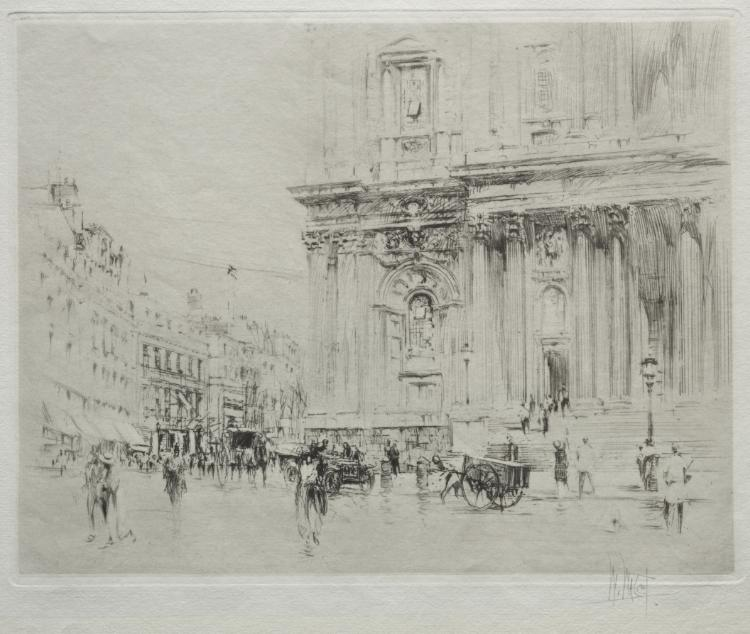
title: St. Paul's, London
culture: England, 20th century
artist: William Walcot (British, 1874–1943)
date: 1920s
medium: etching and drypoint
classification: Print